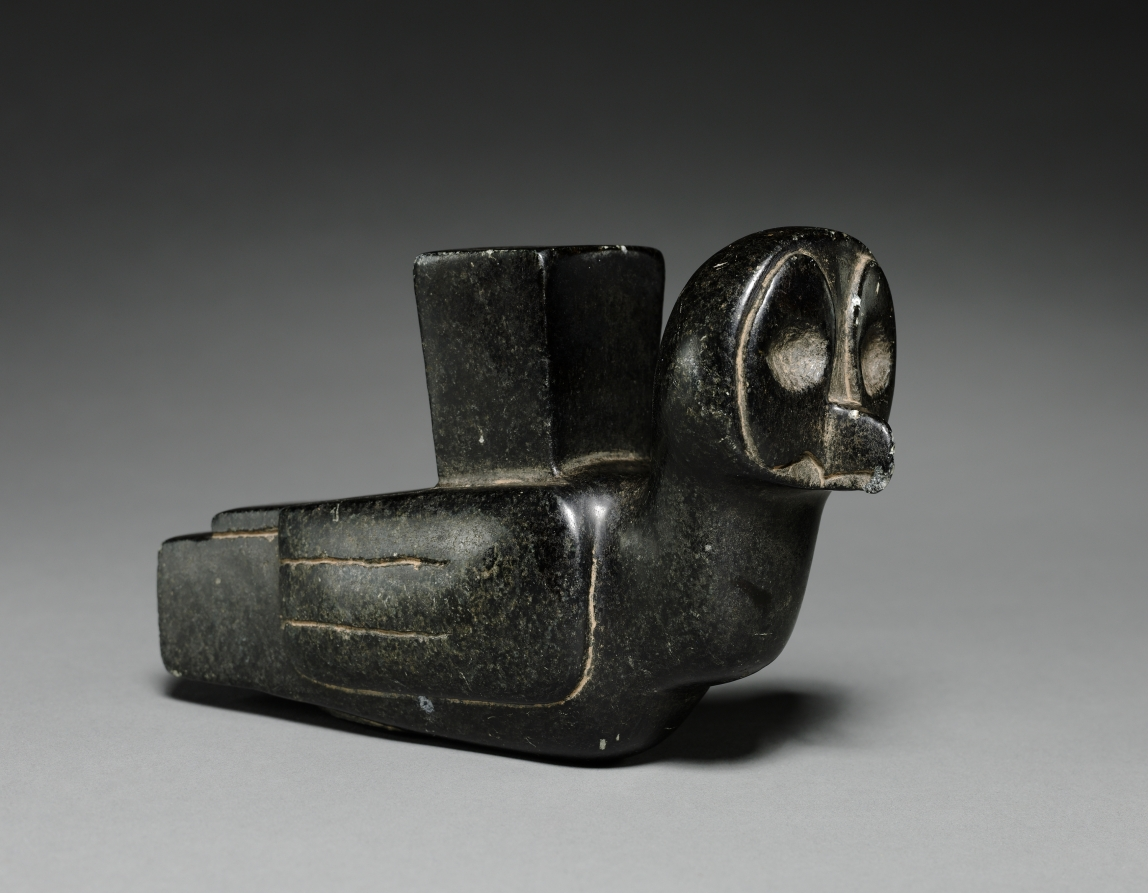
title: Pipe in the Form of an Owl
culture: America, North American Indian, Copena Culture (Tennessee area?)? or modern reproduction, Middle Woodland Period (100-600) or 20th century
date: 100–600 CE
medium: stone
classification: Sculpture